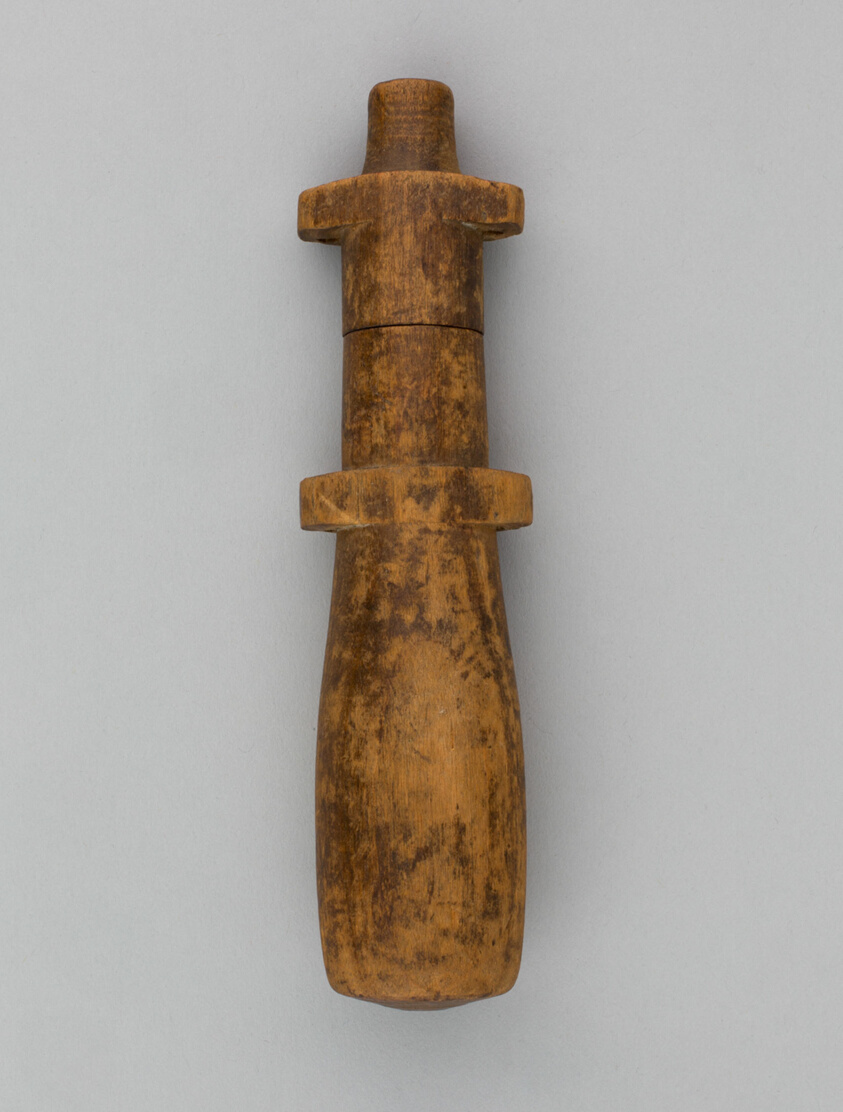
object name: Arms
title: Powder Charge Case of a Musketeer's Bandolier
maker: European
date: late 16th/mid–17th century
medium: Wood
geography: Europe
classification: firearm-accessory; arms; arms and armor